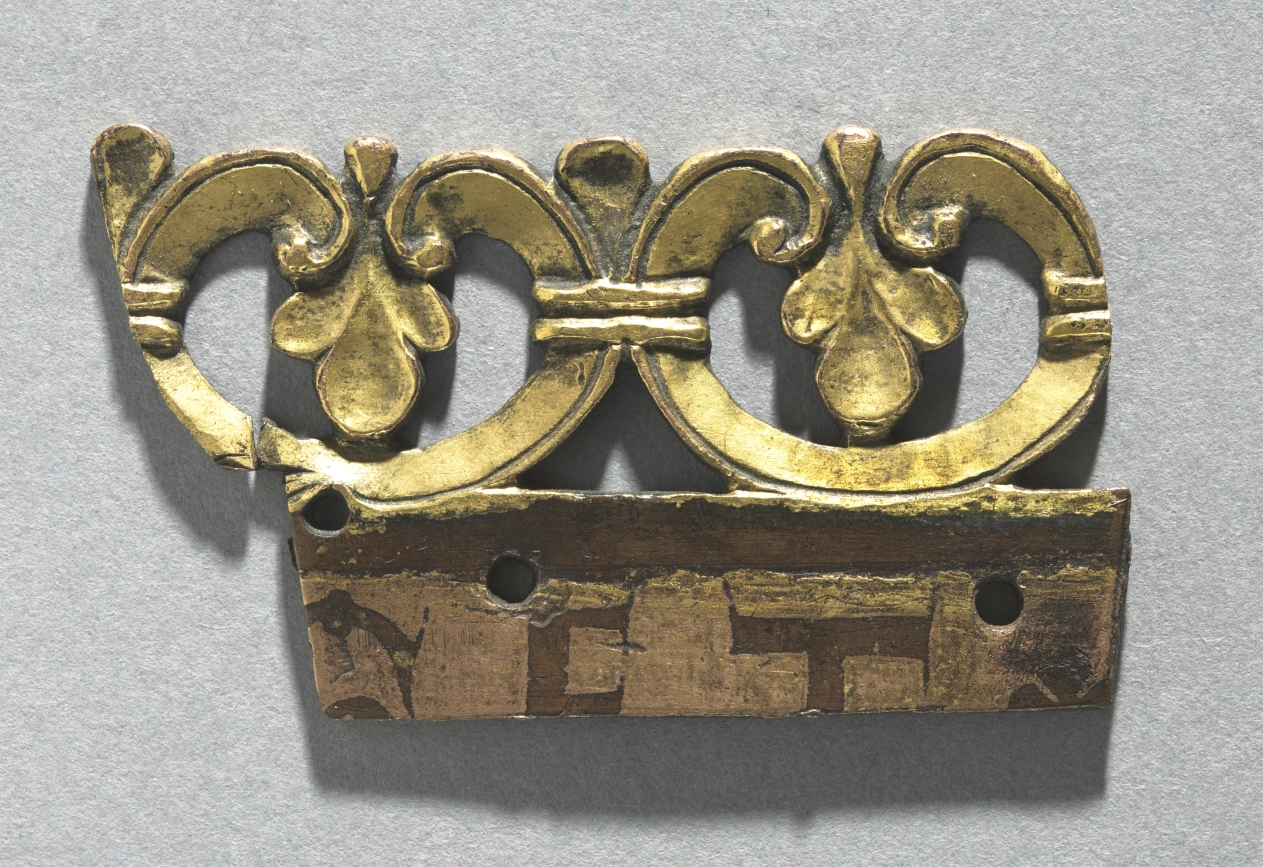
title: Fragment of an Ornamental Crest from a Reliquary Shrine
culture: Mosan, Meuse Valley, Maastricht?, Gothic period, 12th century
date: c. 1165–1180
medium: gilded copper, émail brun (brown enamel)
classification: Metalwork